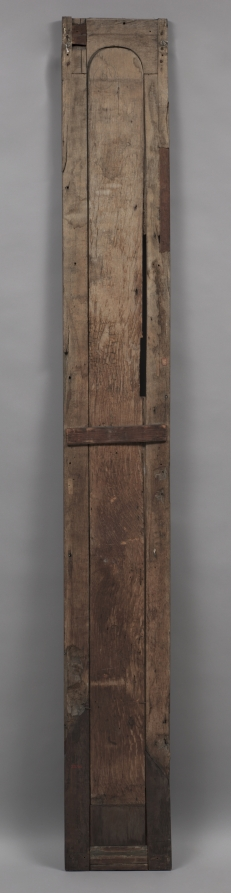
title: Panel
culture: France, Regency Period, 18th Century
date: 1715–1723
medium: wood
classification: Furniture and woodwork